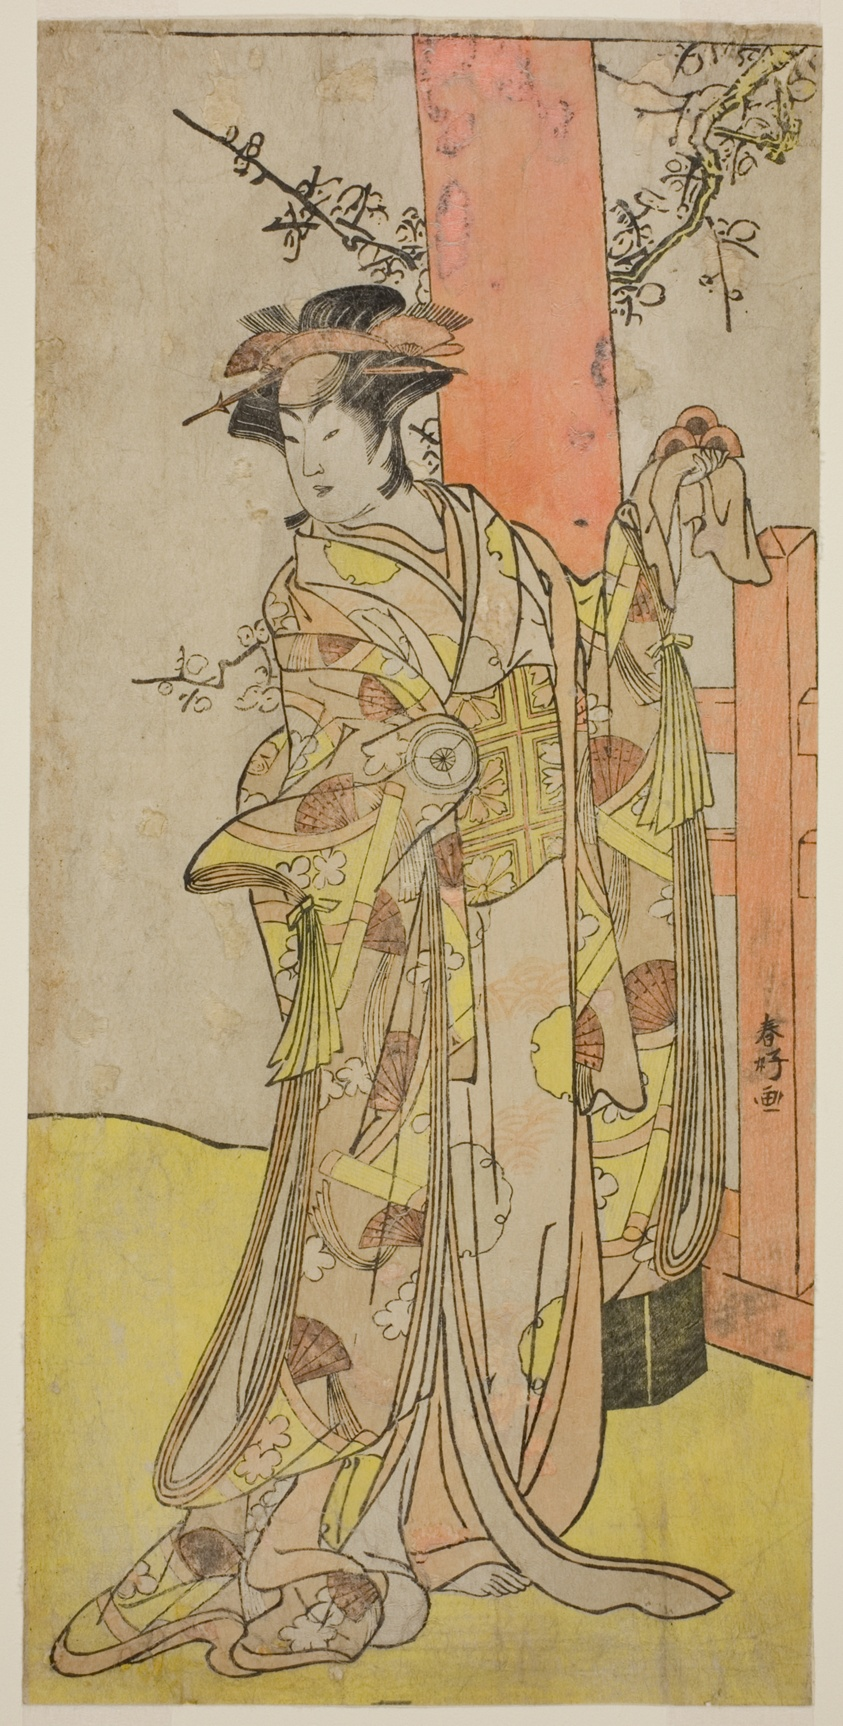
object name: Print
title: The Actor Iwai Hanshiro IV as Kitsune ga Saki Otama (?) in the Play Miyakodori Yayoi no Watashi (?), Performed at the Kiri Theater (?) in the Third Month, 1787 (?)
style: Japanese (culture or style)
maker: Katsukawa Shunko I; Japanese, 1743-1812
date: c. 1787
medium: Color woodblock print; hosoban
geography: Japan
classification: woodblock print; print; asian art